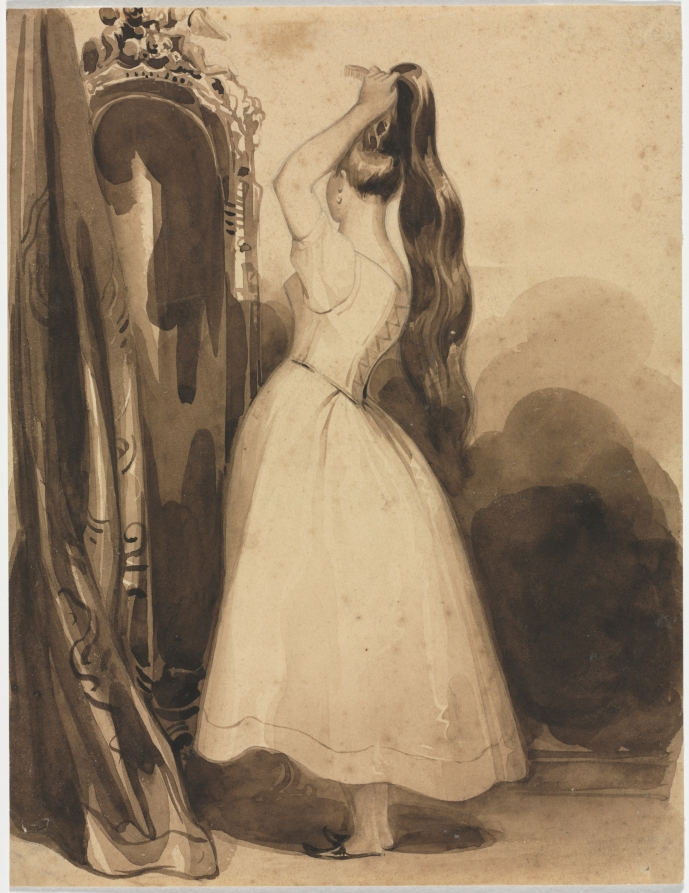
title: Young Woman Combing Her Hair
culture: France, 19th century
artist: Achille Devéria (French, 1800–1857)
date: 1800s, before 1857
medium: graphite and brown wash on off-white wove paper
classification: Drawing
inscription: Inscribed in graphite on verso, lower right: Deveria